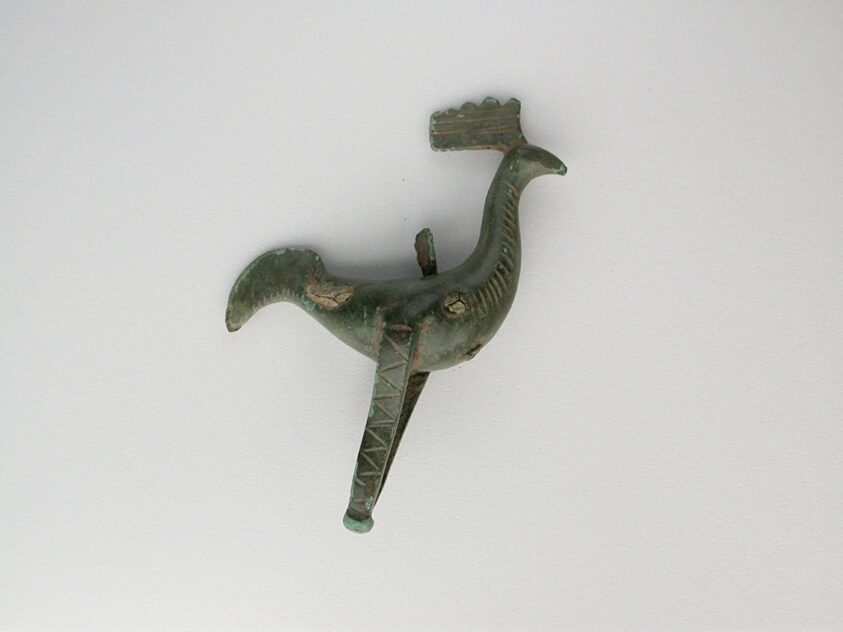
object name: Sculpture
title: Rooster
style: geometric, ancient, greek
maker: Greek; Thessaly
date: Geometric Period (800–600 BCE)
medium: Bronze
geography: Thessalía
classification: votive offering; ex-voto; sculpture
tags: bird